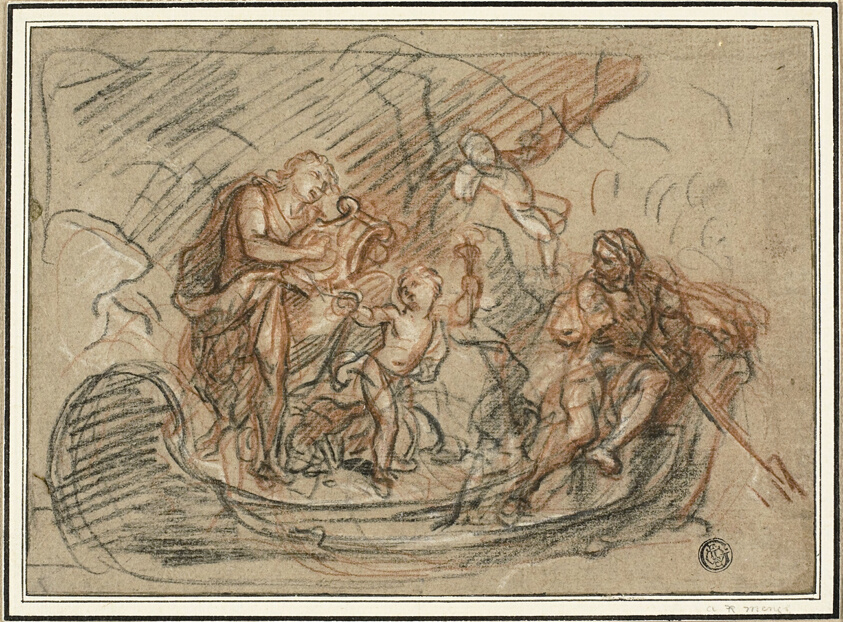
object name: Drawing and Watercolor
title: Orpheus on the River Styx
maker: Antoine Coypel (French, 1661-1722)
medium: Red and black chalks, heightened with white chalk, on tan laid paper, laid down on cream laid card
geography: France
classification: chalk; drawings (visual works); prints and drawing